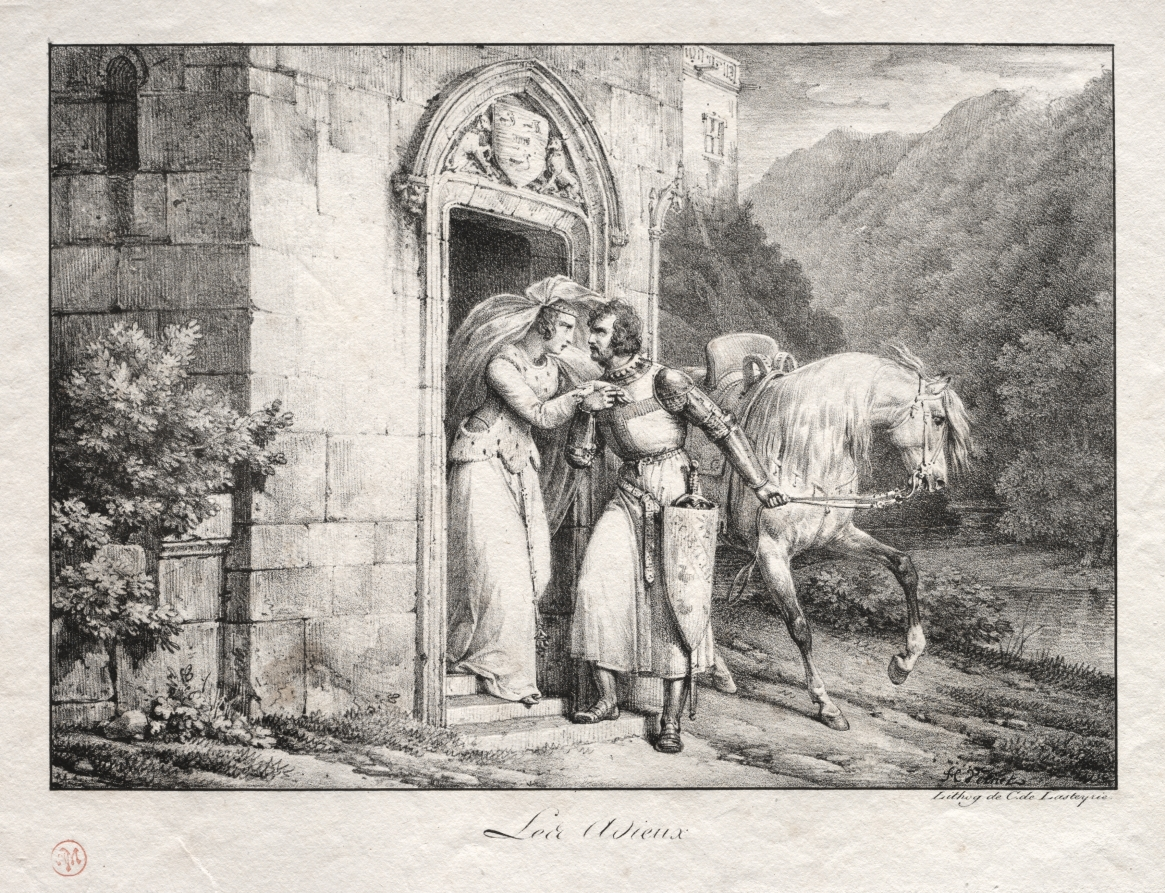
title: The Farewells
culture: France, 19th century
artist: Horace Vernet (French, 1789–1863)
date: c. early 1800s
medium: lithograph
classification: Print